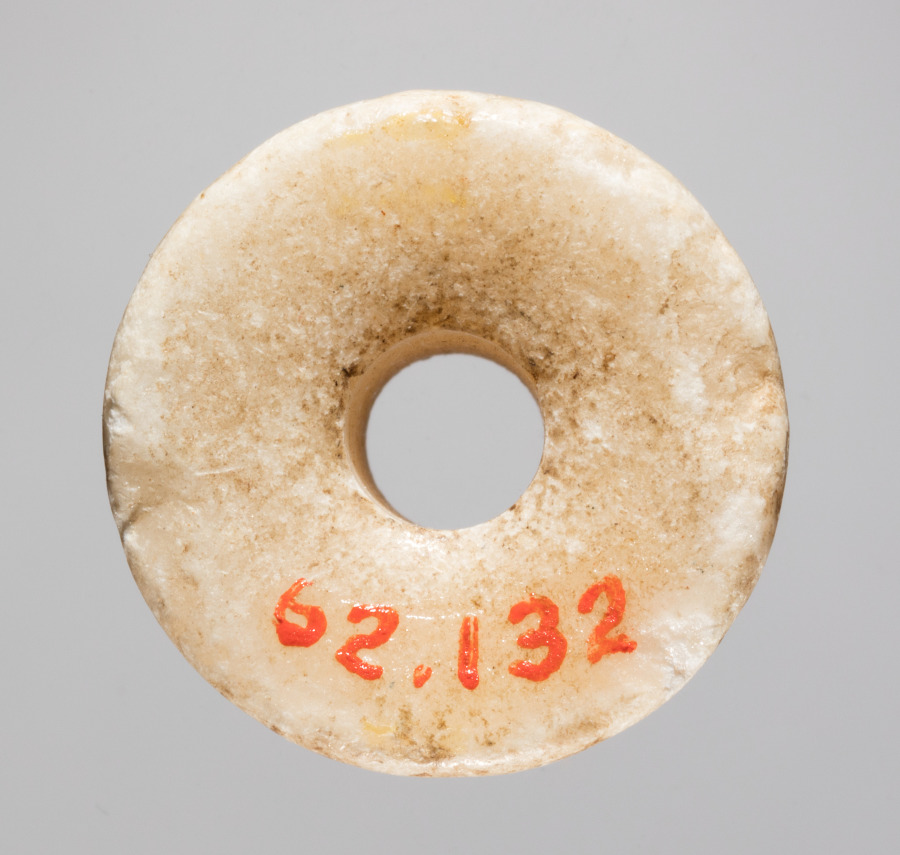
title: Spindle Whorl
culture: Iran, early Islamic period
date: 700s - 900s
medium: bone, incised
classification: Spindle Whorl